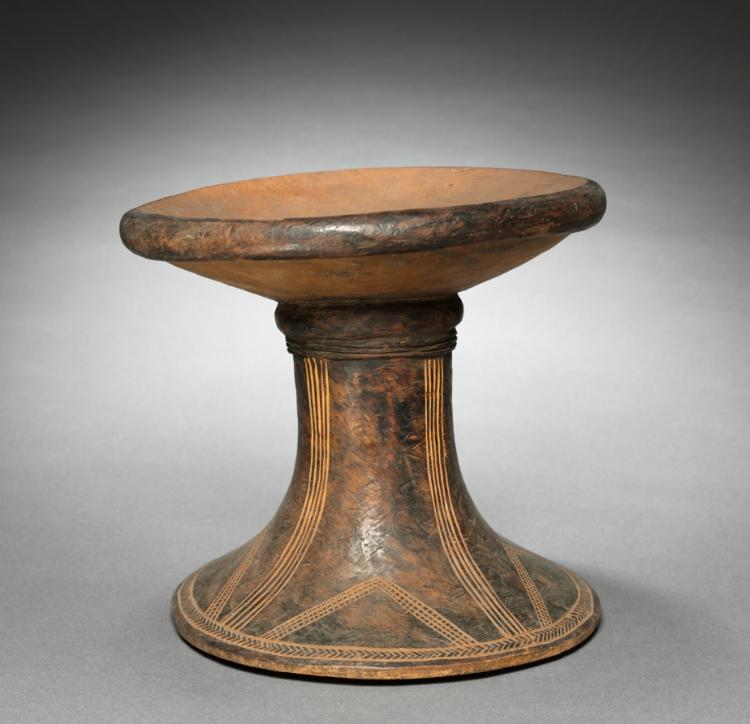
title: Stool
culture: Central Africa, Democratic Republic of the Congo, Nyanga, early 20th Century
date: before 1929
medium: wood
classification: Furniture and woodwork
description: Carved from a single piece of wood, Nyanga stools like this were multipurpose and took on different meanings depending on their use. Shaped like a curved hourglass, the shiny, patinated surface is textured with incised geometric designs. One use was for young male initiates to sit on as they received gifts from relatives following circumcision rites. The stools were oiled for the occasion, which results in the smooth, colored texture visible today.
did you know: This stool isn't asymmetrical, it's ergonomic! The seat tilts to make it more comfortable to use.